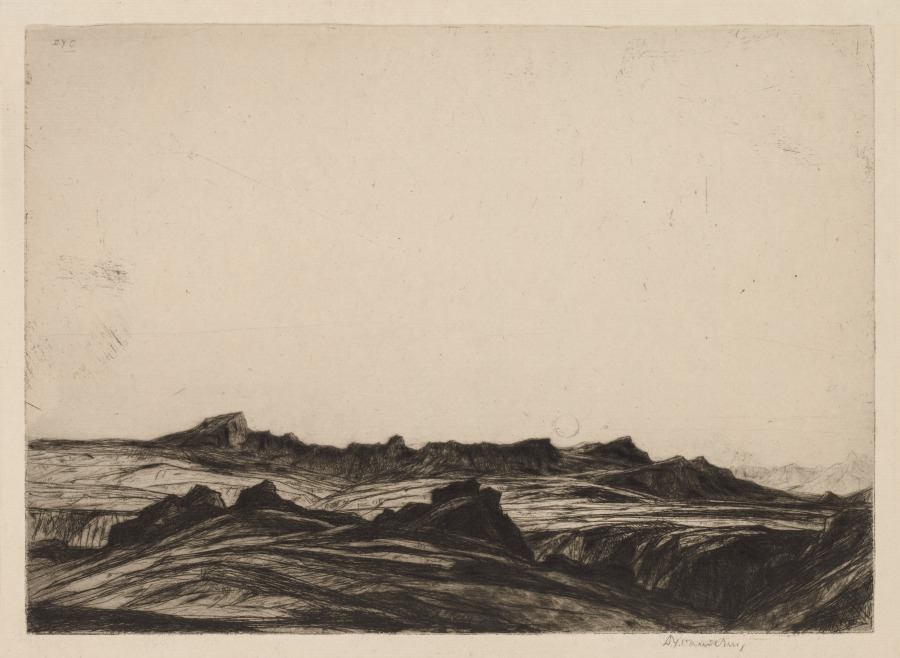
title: Arran Peaks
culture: Britain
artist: David Young Cameron (British, 1865–1945)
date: 1912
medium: Etching and drypoint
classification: Print